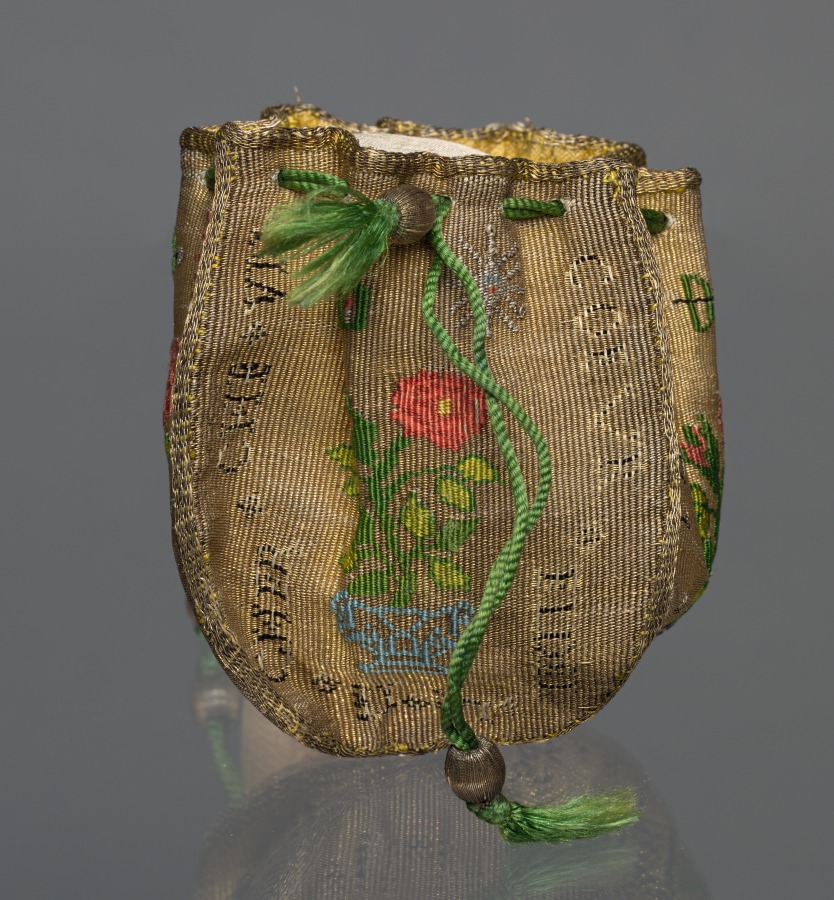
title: Woven Purse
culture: France, 18th century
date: 1700s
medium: tapestry, silk and gold thread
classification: Garment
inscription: woven in black along edges and repeated on alternating sides: "le if cherche un coeur fidele" alternates with "il employ mal sou temps."